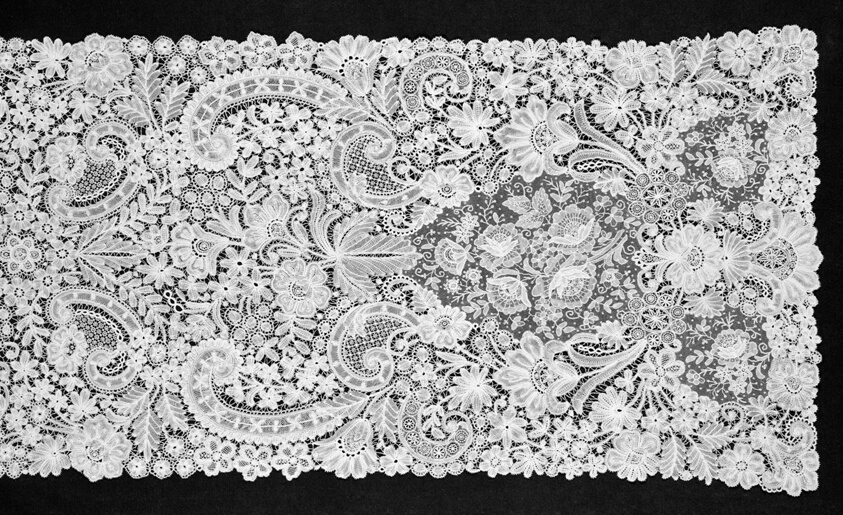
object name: Costume and Accessories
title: Shawl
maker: Belgium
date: 1875/1900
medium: Cotton, mixed lace: bobbin lace of a type known as "Point de Gaze"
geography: Belgium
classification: textile; lace - mixed; lace; costume